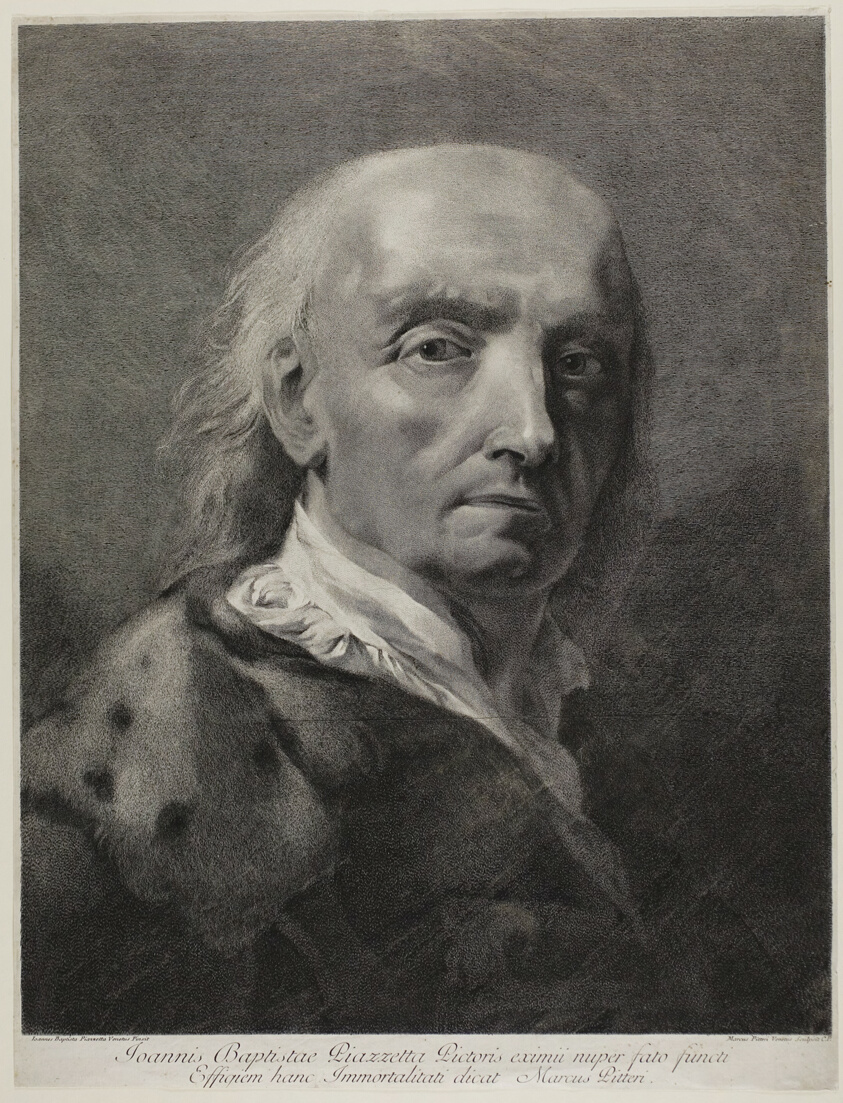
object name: Print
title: Portrait of the Painter Giovanni Battista Piazzetta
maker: Giovanni Marco Pitteri; Italian, 1702-1786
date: c. 1750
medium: Engraving in black on paper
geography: Venice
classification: engraving; print; prints and drawing